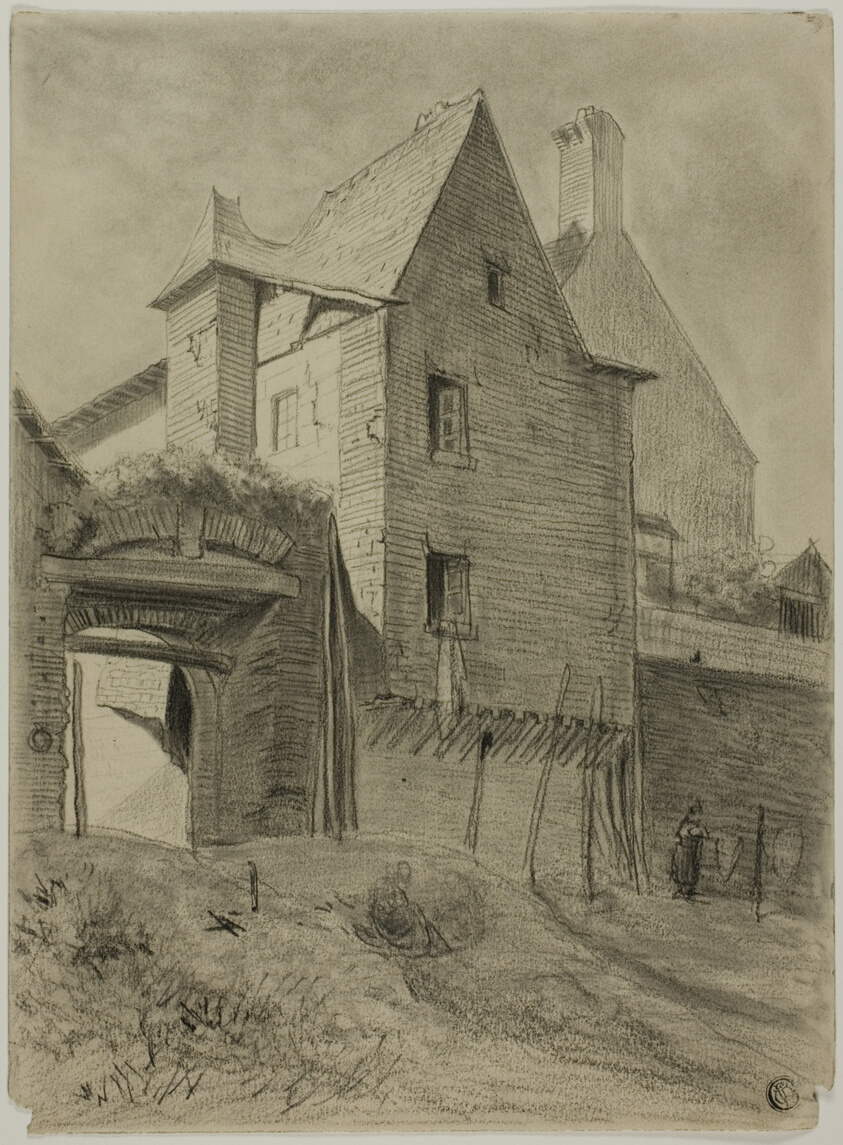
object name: Drawing and Watercolor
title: Remnant of Old Castle Incorporated in Farm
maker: Unknown Artist; Dutch, 18/19th century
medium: Black crayon, with stumping, on cream wove paper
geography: Holland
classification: crayon; drawings (visual works); prints and drawing